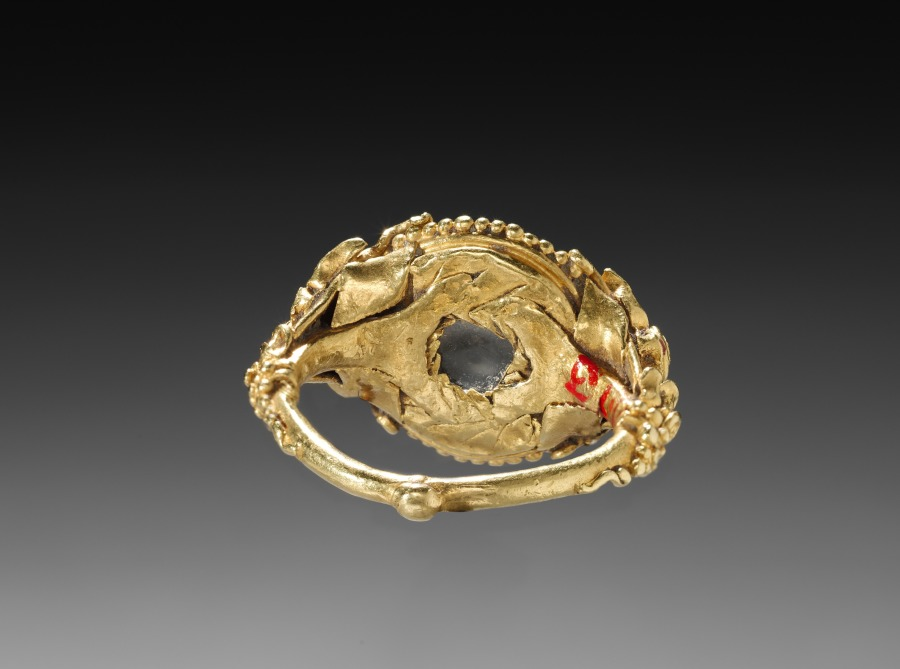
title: Ring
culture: Cambodia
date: 1800s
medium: gold with moonstone and rubies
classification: Jewelry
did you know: This gold ring features a large moonstone in a floral setting enlivened with rubies.